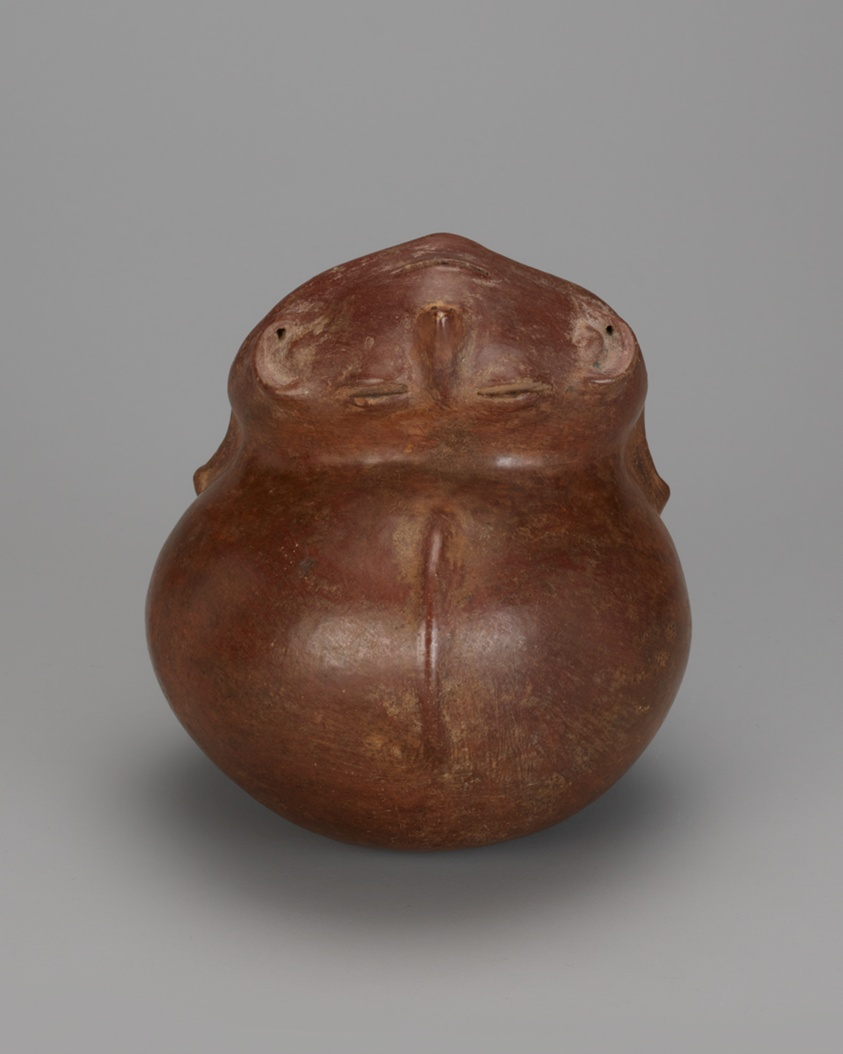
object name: Vessel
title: Vessel of a Male Figure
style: casas grandes, americas, Arts of the Americas, native american, native north american, southwest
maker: Ceramist unknown (Casas Grandes); New Mexico, United States, or Chihuahua, Mexico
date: 1280–1450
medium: Ceramic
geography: New Mexico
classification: vessel; art of the americas; ceramics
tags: figure, human figures